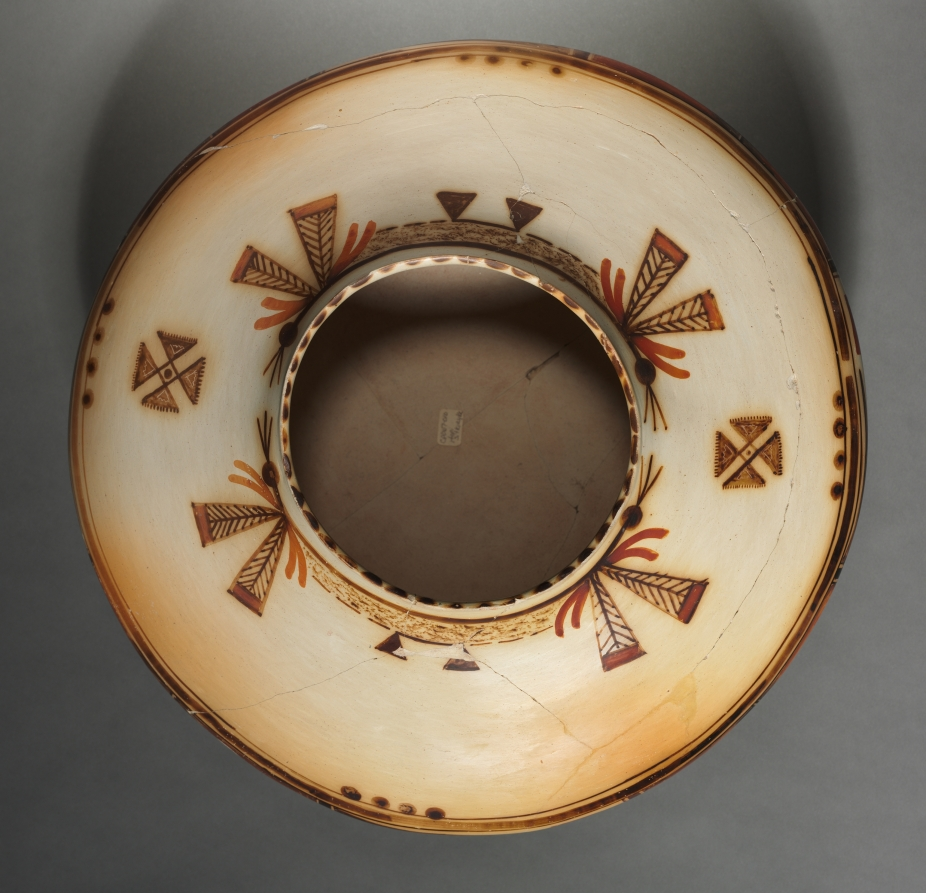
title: Jar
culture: Native North America, Southwest, Ancestral Pueblo, Sikyatki style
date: 1400–1600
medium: Ceramic, slip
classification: Ceramic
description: Ancient Sikyatki ceramics are noted for their large, distinctive shapes, meticulously stone-polished surfaces, thin walls that “ring” when tapped, and wide variety of reds and oranges, a contrast to earlier preferences for black and white. These artistically and technically inventive vessels are ancestral to modern Hopi ceramics, having developed in the area where Hopi communities live today. The Hopi regard a mottled orange color as a sign that the pot emerged from firing with life and spirit; the vessel’s “voice” is a bell-like tone that tapping produces. Such concepts likely have roots in the ancient past.